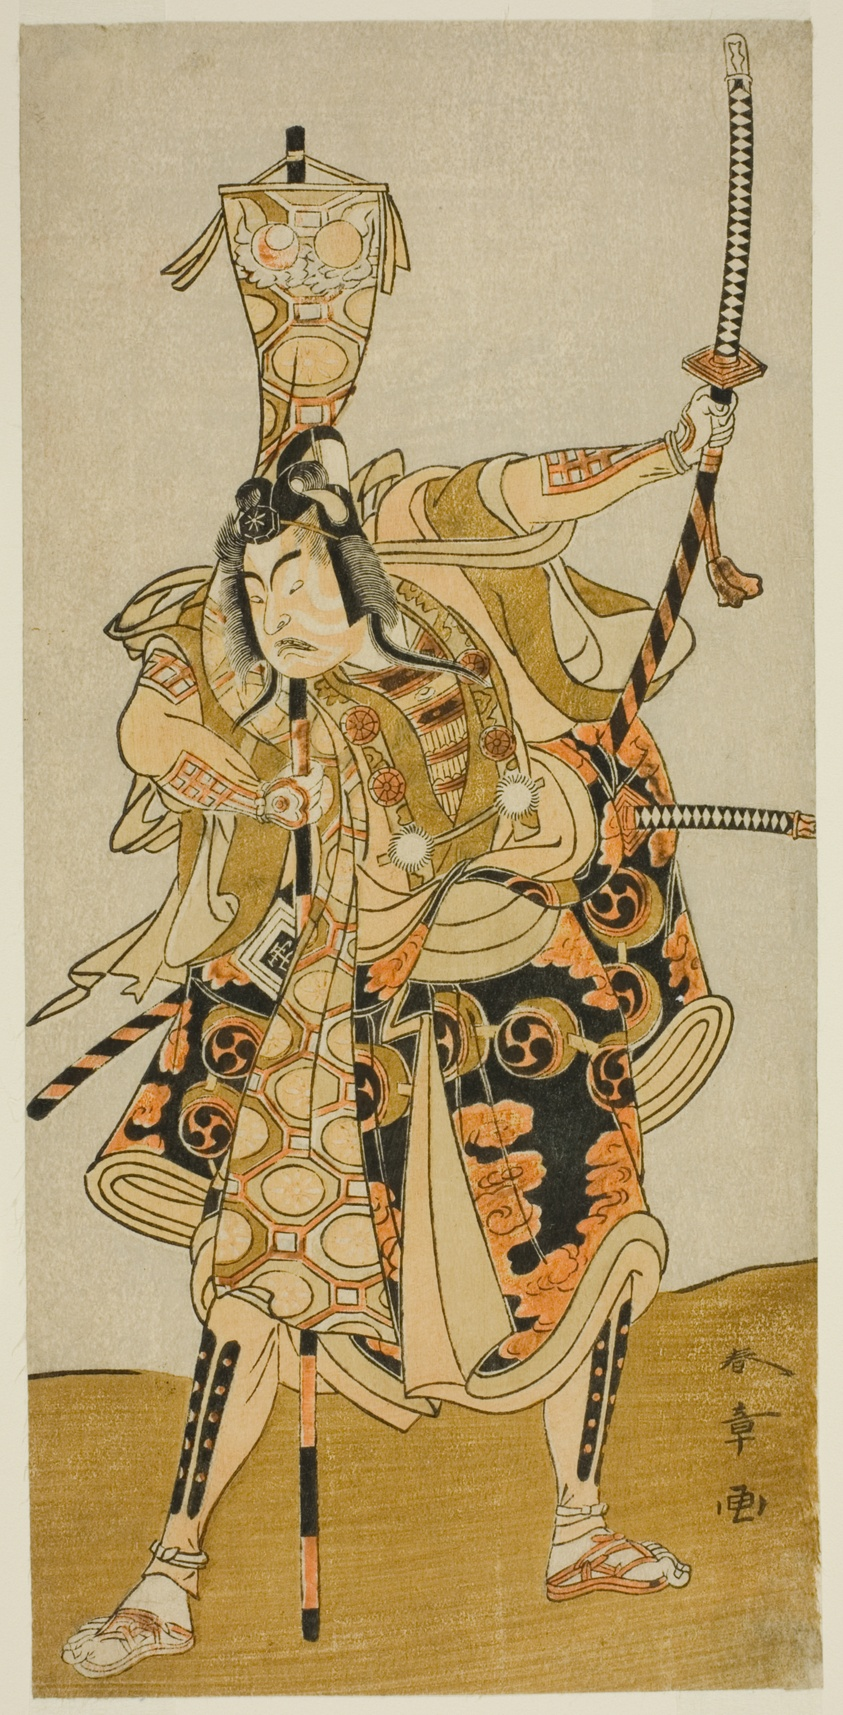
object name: Print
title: The Actor Ichikawa Raizo II as Murakami Hikoshiro Yoshiteru in the Play Oyoroi Ebido Shinozuka, Performed at the Nakamura Theater in the Eleventh Month, 1772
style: Japanese (culture or style)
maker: Katsukawa Shunsho 勝川 春章; Japanese, 1726-1792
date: c. 1772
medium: Color woodblock print; hosoban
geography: Japan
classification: woodblock print; print; asian art